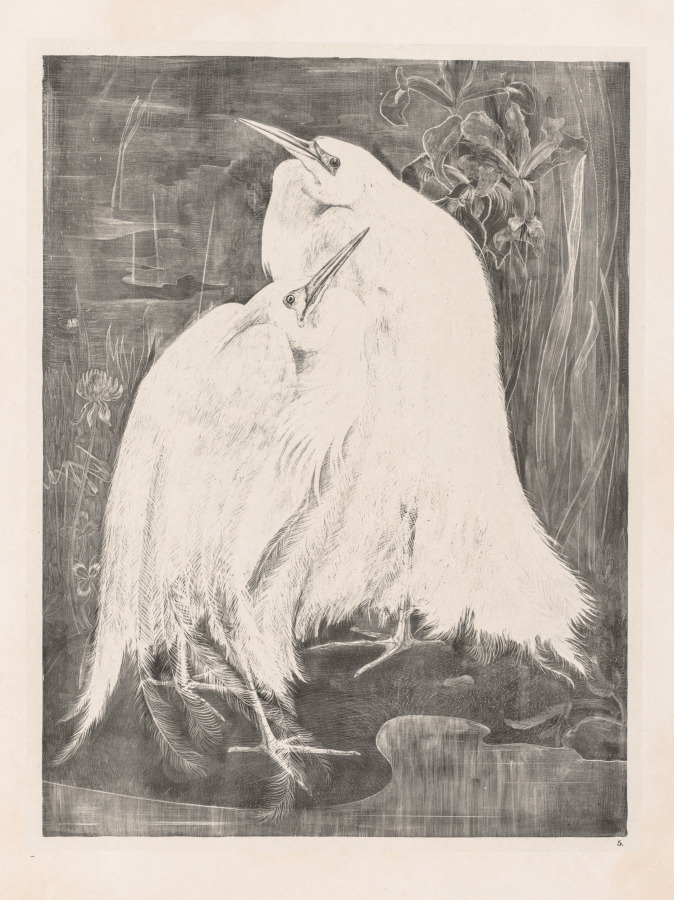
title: Animal Studies: Two Silver Herons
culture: Netherlands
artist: Theo van Hoytema (Dutch, 1863–1917)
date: 1898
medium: embossed lithograph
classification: Print